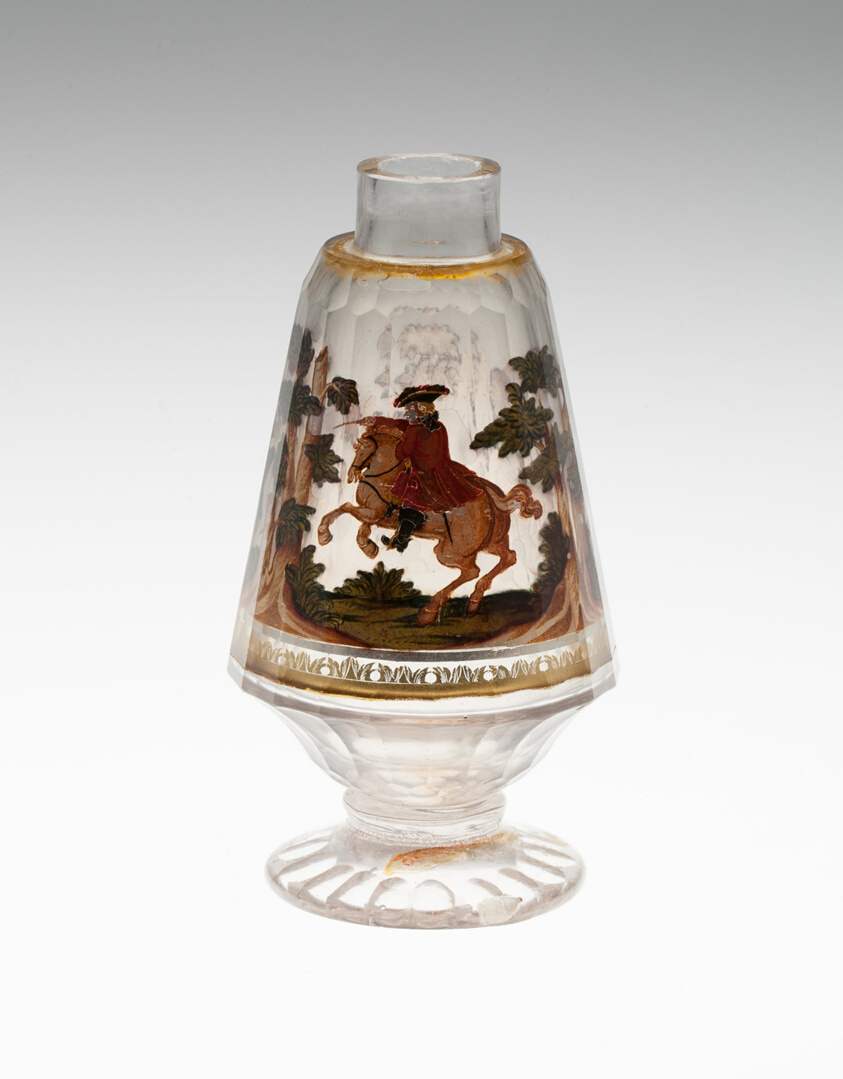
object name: Glass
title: Bottle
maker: Bohemia, Czech Republic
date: c. 1725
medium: Glass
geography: Bohemia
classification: glass; european decorative arts